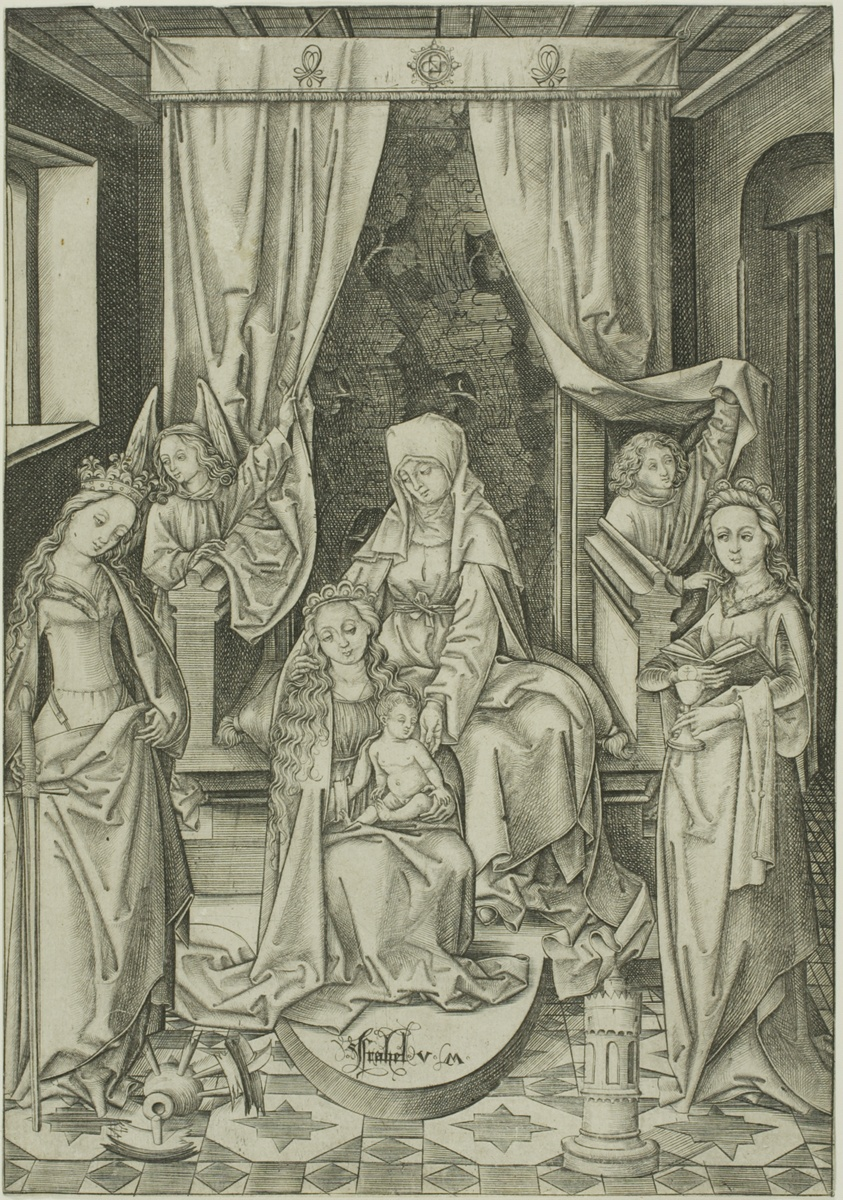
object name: Print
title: The Madonna with St. Anne, St. Catherine and St. Barbara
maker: Israhel van Meckenem the Younger; German, c. 1440/45-1503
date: 1490–1500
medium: Engraving in black on ivory laid paper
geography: Germany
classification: engraving; print; prints and drawing